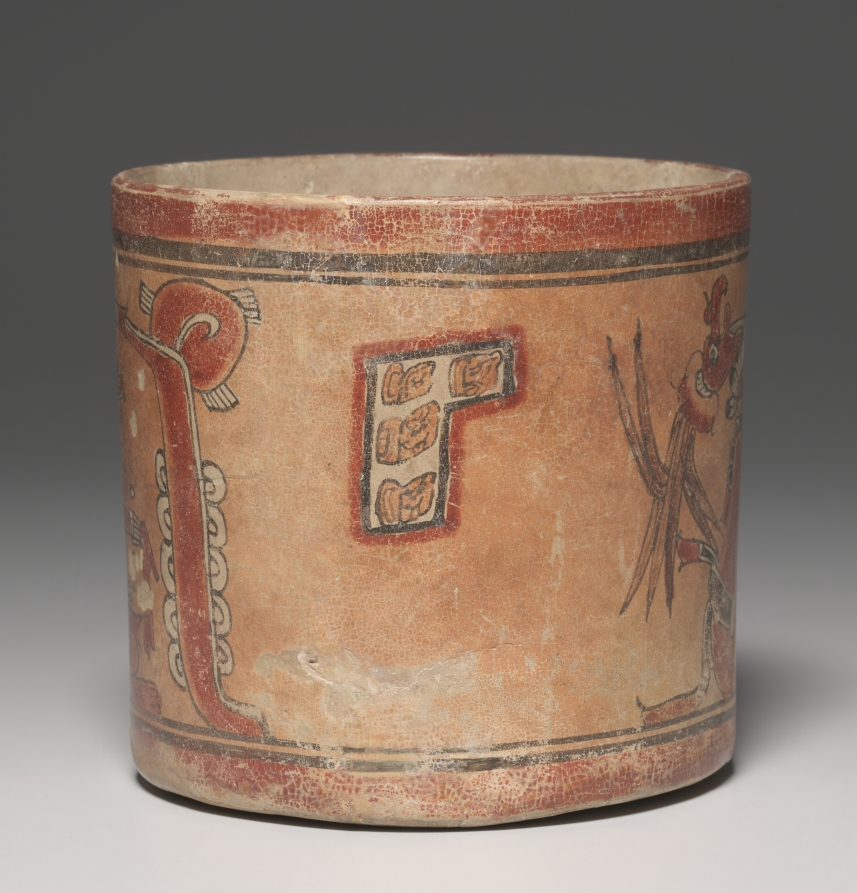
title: Cylinder Vessel with Deities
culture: Guatemala, Kixpek, Maya (Chamá) style (250-900)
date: 600–900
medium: earthenware with colored slips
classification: Ceramic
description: Between AD 600 and 900, Maya cities and towns mushroomed in number, interacted, and competed. Since a distinctive ceramic painting style was part of many centers' identities, the number of styles exploded and painted pottery became a hallmark of the era. This vessel, painted with a ruler's patron deity (God K), is of a style produced briefly in one area of Guatemala's Chamá Valley.